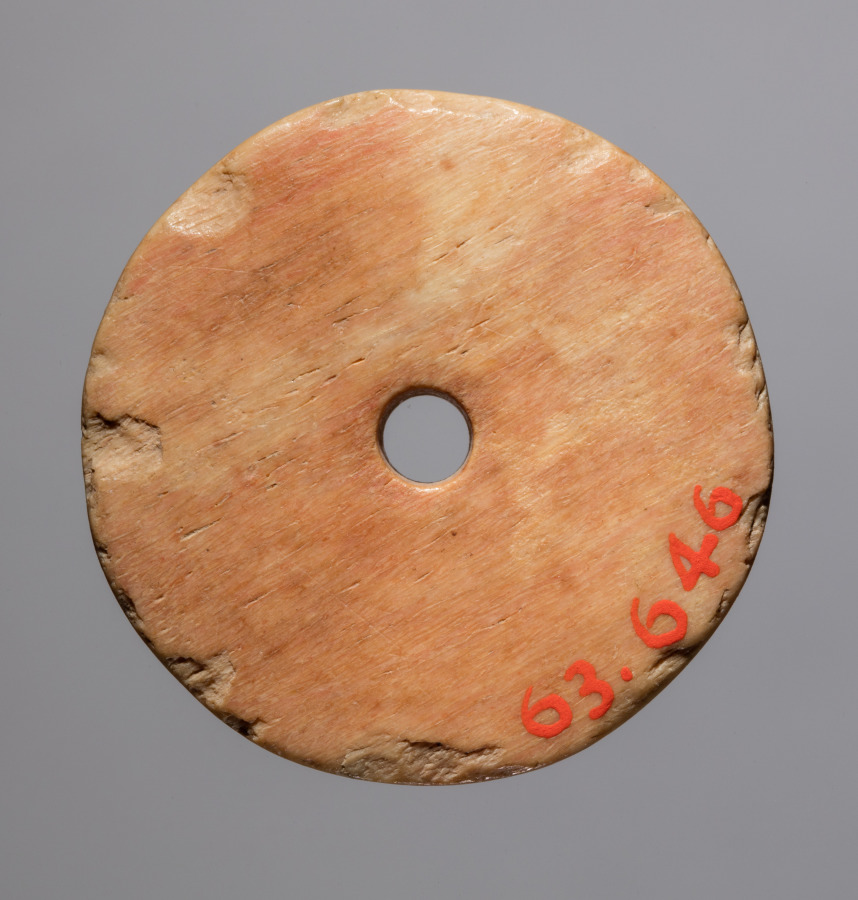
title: Spindle Whorl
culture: Iran, early Islamic period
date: 700s - 900s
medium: bone, incised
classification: Spindle Whorl